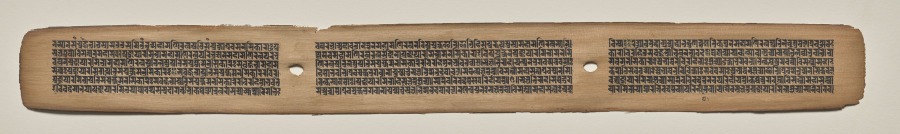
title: Text, Folio 143 (recto), from a Manuscript of the Perfection of Wisdom in Eight Thousand Lines (Ashtasahasrika Prajnaparamita-sutra)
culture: Eastern India, Bihar, Vikramashila Monastery. Painting: Nepal, Kathmandu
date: Sunday, September 14, 1119 (year 239 of the Newar Samvat in the month of Ashvina)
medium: gum tempera and ink on palm leaves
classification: Painting